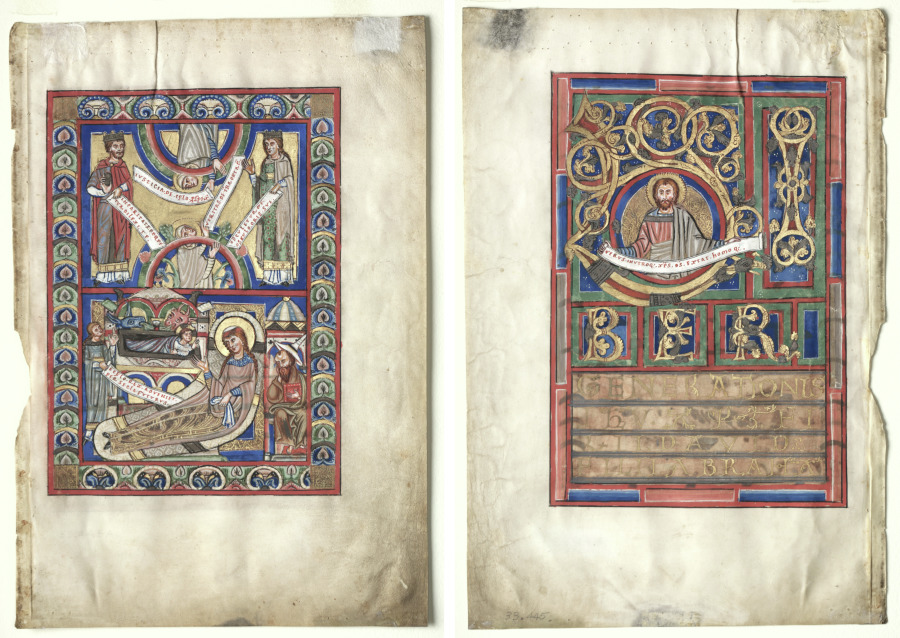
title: Single Leaf Excised from a Gospel Book: The Nativity (recto) and St. Matthew (verso)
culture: Germany, Helmarshausen Abbey, 12th century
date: c. 1190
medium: ink, tempera, silver, and gold on vellum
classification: Manuscript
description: This leaf comes from a volume that is preserved in the Trier Cathedral Library in Germany (Codex 142).